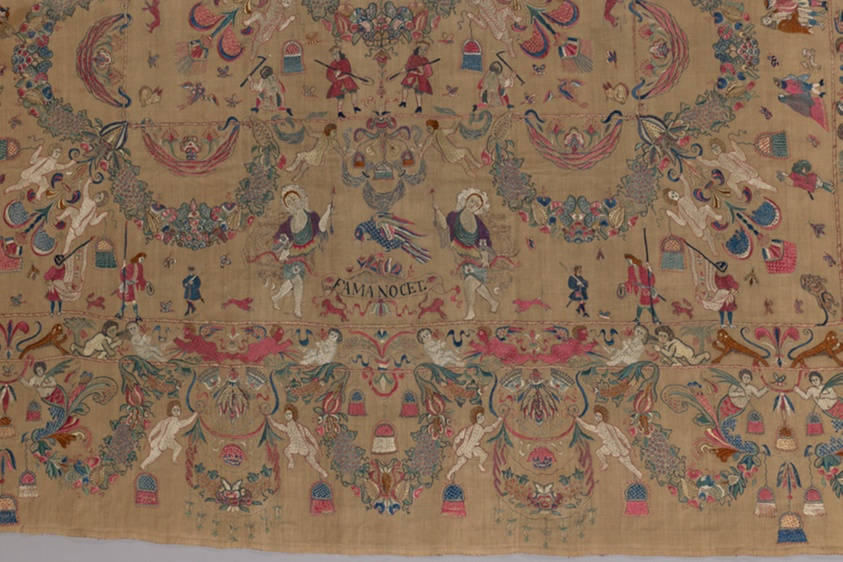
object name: Coverings and Hangings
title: Embroidery with Allegorical and Mythological Motifs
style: peruvian, 17th Century, latin american, colonial Peru, south american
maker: Peru, probably Lima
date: 1660s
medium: Silk embroidery on cotton foundation textile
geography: South America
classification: embroidery; textile; ceremonial object; needlework (visual works)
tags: mythological figures, warriors, robes, lions, female figures, bows and arrows, archers, ceremonial objects, power